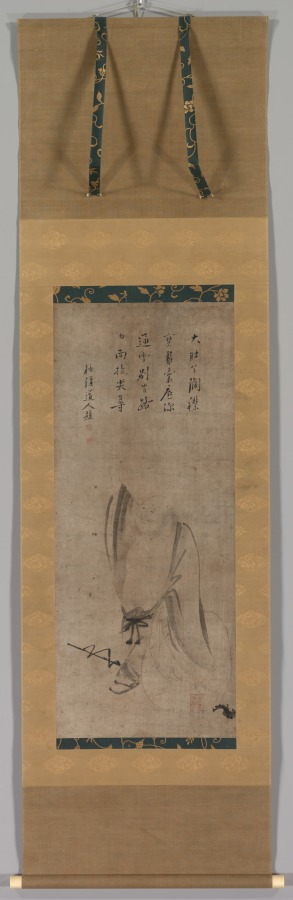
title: Hotei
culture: Japan, Muromachi period (1392–1573)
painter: Yamada Dōan I (Juntei) (Japanese, d. 1573)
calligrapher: Tōkei Jakurin (Japanese, dates unknown)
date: mid-1500s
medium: hanging scroll; ink on paper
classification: Painting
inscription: 桃渓道人 題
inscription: 大肚兮濶襟 寶聚嚢底沵 通霄別有路 勿向指尖尋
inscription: 落款 桃渓之印 若霖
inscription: 印章 山田氏道安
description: Hotei is a semilegendary figure who may have lived from the late 800s to the early 900s. He later became prominent in Chan (or Zen, in Japanese) Buddhist literature. He epitomizes the freewheeling figure outside the mainstream monastic system—in which people strive for enlightenment through prescribed methods—who nonetheless attains a high level of spiritual awakening. The inscription warns against seeking enlightenment by conscious effort: Big stomach, gaping garment, Treasures gathered deep in the bottom of his bag, Passing through the sky is another road, Do not seek that to which his fingertip points.